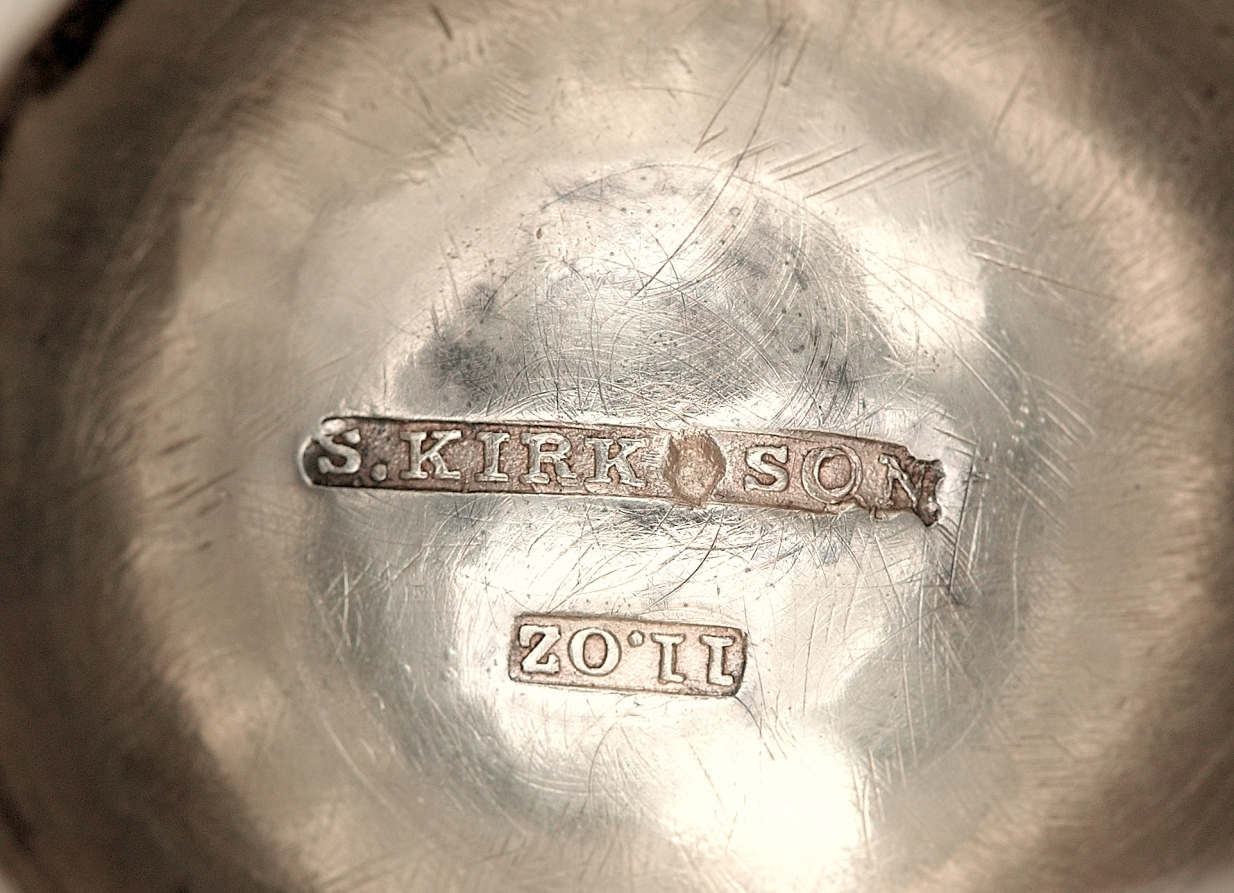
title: Neo-Rococo Coffee Pot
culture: America, Baltimore, 19th century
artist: Samuel Kirk (American, 1793–1872)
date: c. 1840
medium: silver and ivory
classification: Silver